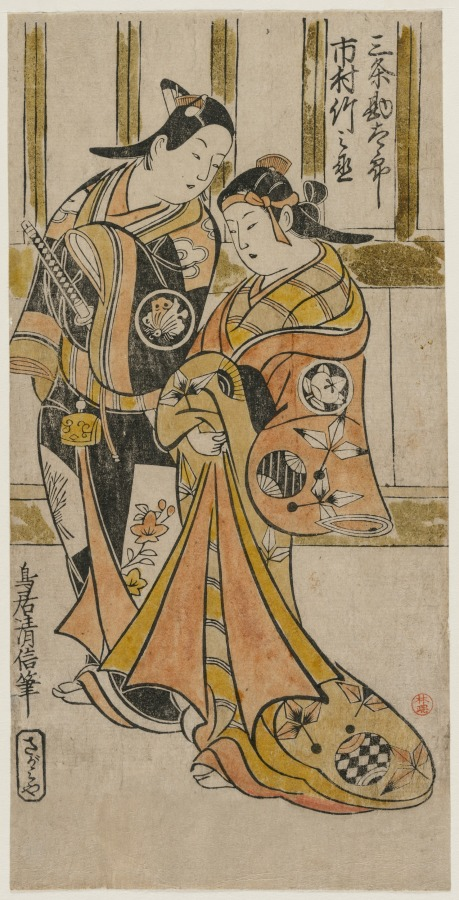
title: Ichimura Takenojo and Sanjo Kantaro as a Pair of Lovers in the Yoshiwara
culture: Japan, Edo period (1615–1868)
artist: Torii Kiyonobu I (Japanese, 1664–1729)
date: early 1720s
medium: hand-colored woodblock print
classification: Print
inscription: Signature: Torii Kiyonobu hitsu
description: Kiyonobu's prints are usually hand-colored and outlined in black. They often depict actors and scenes from plays. Kiyonobu's was largely responsible for introducing theater prints as commercial products. He is regarded as the founder of the Torii school, which with its close relationship to the theater, dominated printmaking for 75 years until the appearance of Shunsho in the late 1700s.